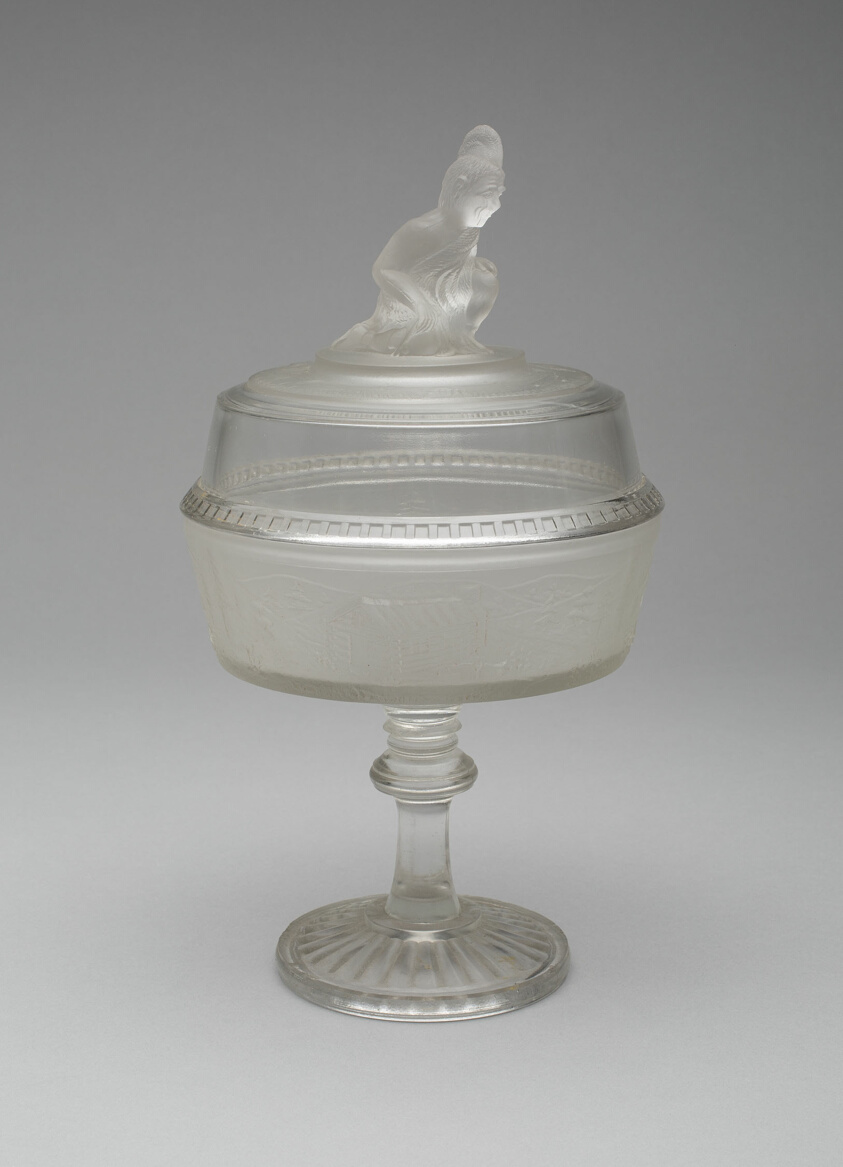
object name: Glass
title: "Westward Ho!/Pioneer" pattern covered compote on pedestal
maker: Gillinder and Sons, 1861–c. 1930; Philadelphia or Greenbsburg, Pennsylvania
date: c. 1876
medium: Glass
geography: Philadelphia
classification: compote; glass; vessel for serving food; american decorative arts; american arts; decorative arts